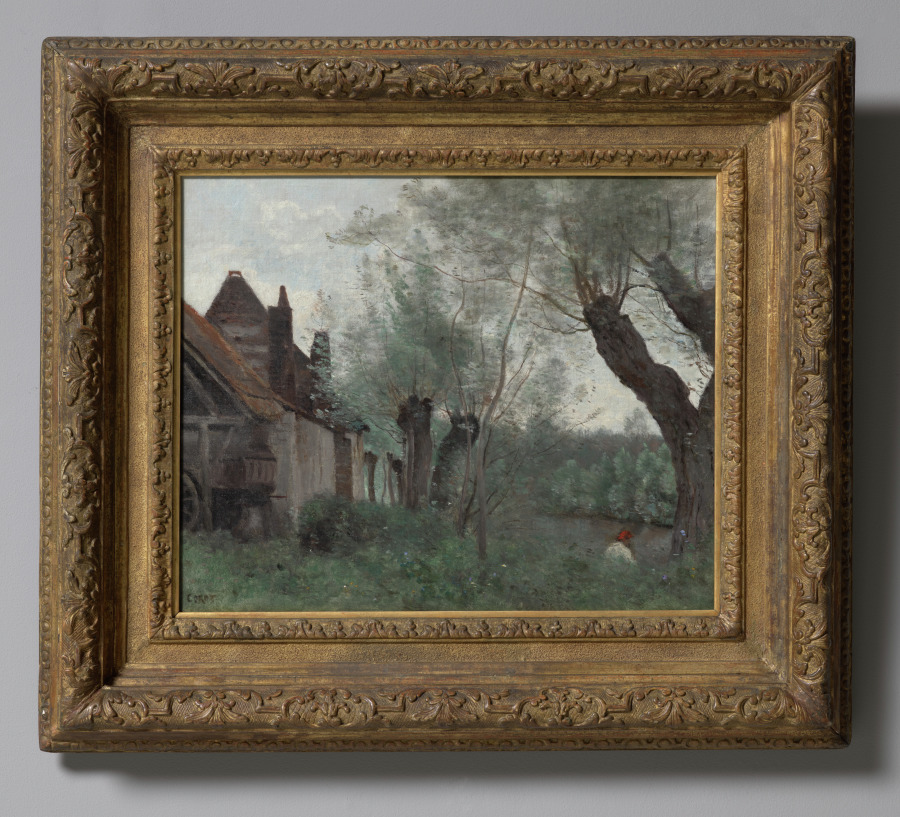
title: Willows and Farmhouse at Sainte-Catherine-lès-Arras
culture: France, 19th century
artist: Jean Baptiste Camille Corot (French, 1796–1875)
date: 1871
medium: oil on fabric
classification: Painting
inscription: Signed lower left: corot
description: With its quiet water and sky, fluffy trees, and other foliage flecked with light, this picture exemplifies the style that won Corot success with a wide public. It was painted during the artist's stay at Arras (about 100 miles north of Paris) in 1871.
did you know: Corot began his career as a draper and his exposure to the colors and textures of fabrics helped him develop an astute aesthetic sense.